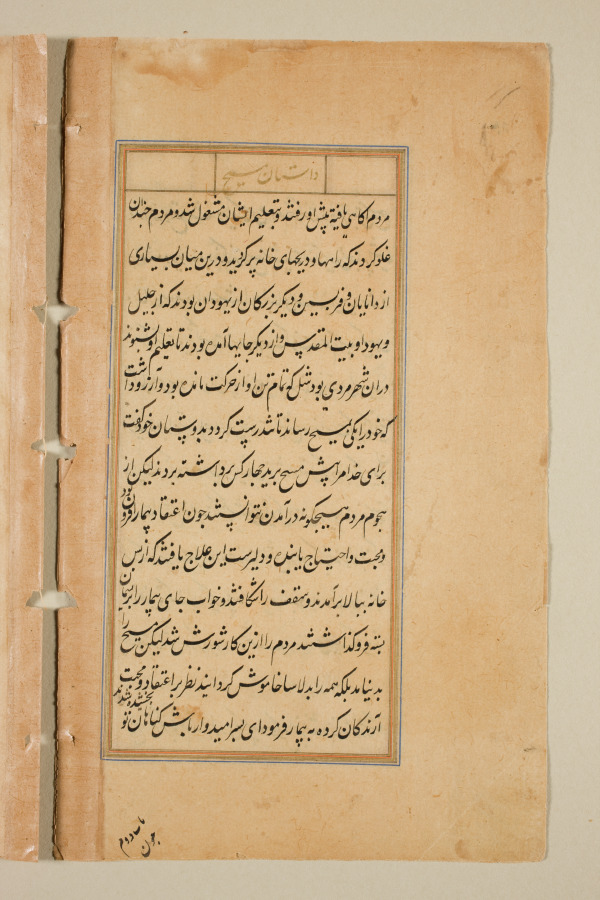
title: Text page from a Mirror of Holiness (Mir’at al-quds) of Father Jerome Xavier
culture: Mughal India, Allahabad, made for Prince Salim (1569–1627)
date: 1602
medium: Ink and gold on paper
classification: Manuscript